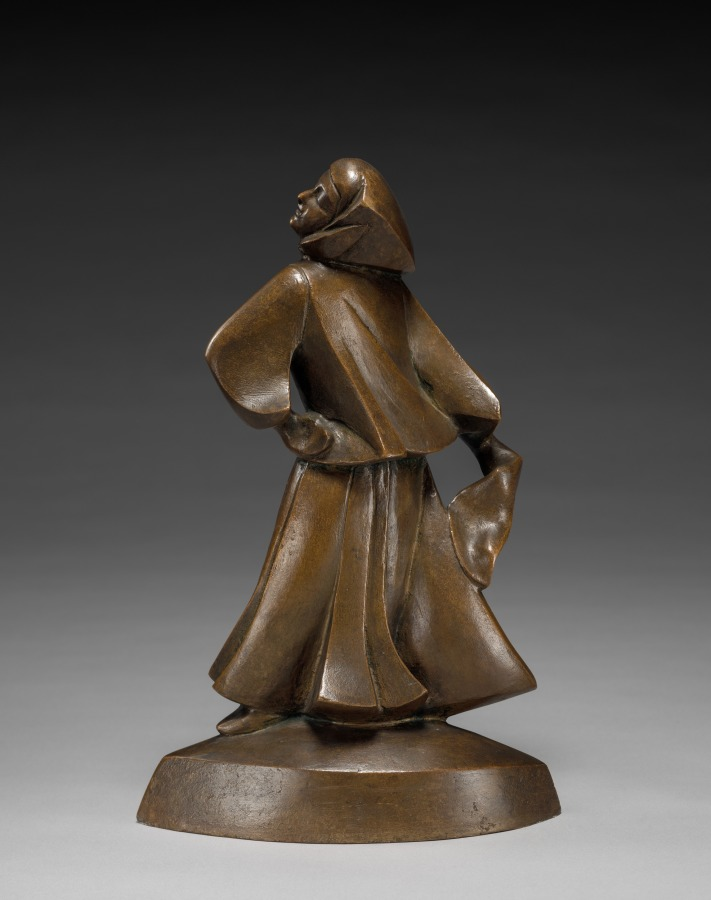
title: Russian Dancer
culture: America, Ohio, Cleveland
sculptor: Alexander Blazys (American, born Russian Empire [now Lithuania], 1894–1963)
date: 1925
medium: bronze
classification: Sculpture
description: A Lithuanian immigrant, Blazys introduced modernist sculpture to Cleveland upon his arrival in 1925. These figures merge rhythmic movement inspired by music with faceted, geometric planes derived from Cubism.